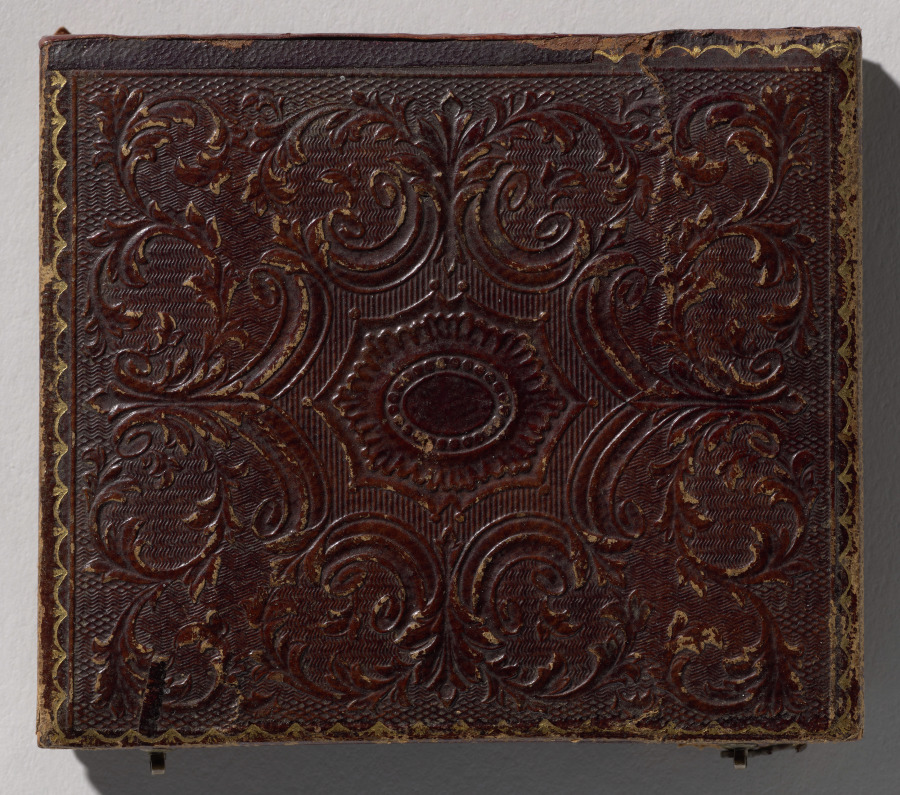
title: Post-Mortem on Pillow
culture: America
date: c. 1855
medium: ambrotype, tinted, sixth plate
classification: Photograph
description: Children have always been particularly cherished subjects for photography. Portraits were made to preserve the memory of their stages of growth and, in an age when long-distance travel was rare, to share with faraway relatives. And, for a sadder reason: in 1840 an estimated one-third of children died before age five. Photography offered grieving parents the opportunity to immortalize their children’s features. This tragic genre of photographs, later called “post-mortems,” often depicts the children in fine clothing, laying down with eyes shut, as if merely napping.